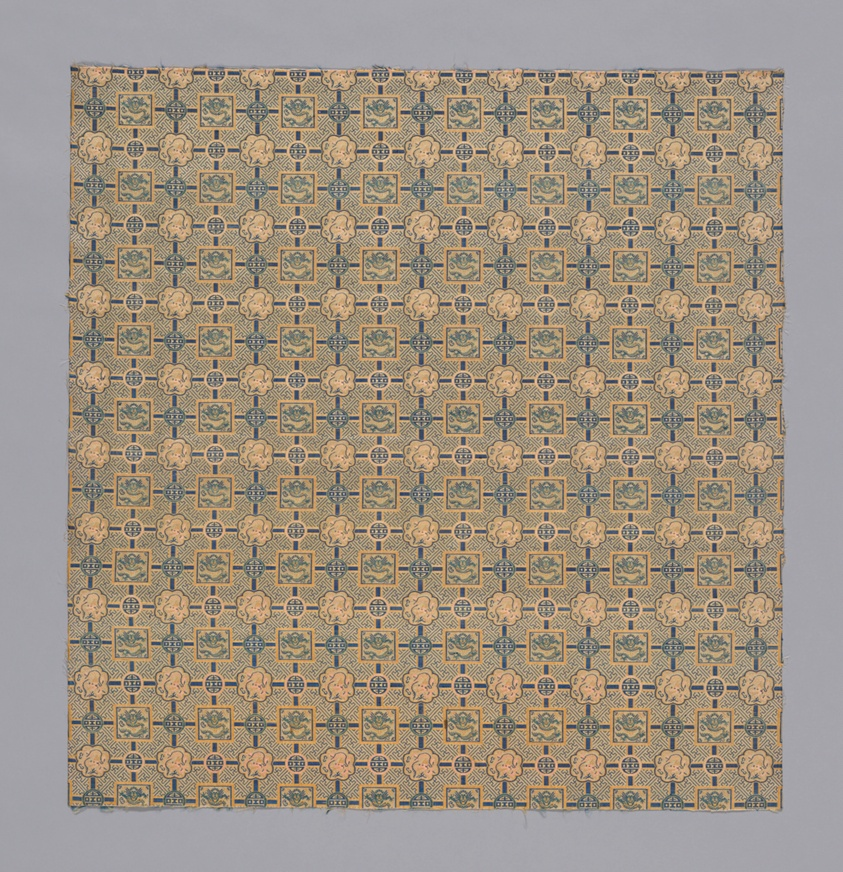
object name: Textile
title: Fragment (Furnishing Fabric)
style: qianlong, qing, Chinese (culture or style), East Asian, asian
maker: China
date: Qing dynasty (1644–1911), 1850/1900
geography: China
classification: textile; weaving; furnishing textile